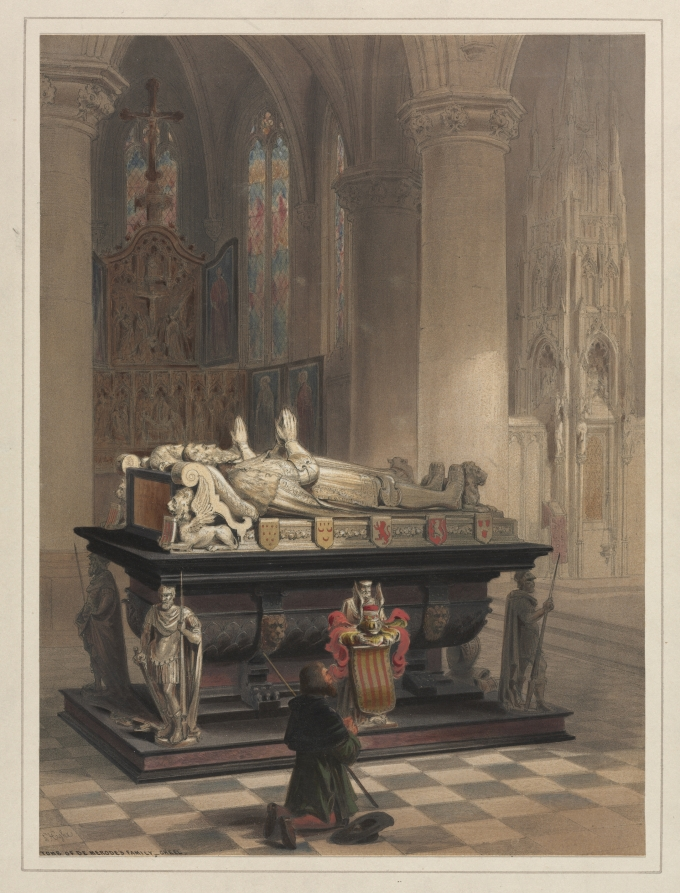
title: Tomb of De Merode's Family, Gheel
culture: England, 19th century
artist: Louis Haghe (British, 1806–1885)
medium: color lithograph with hand coloring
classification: Print